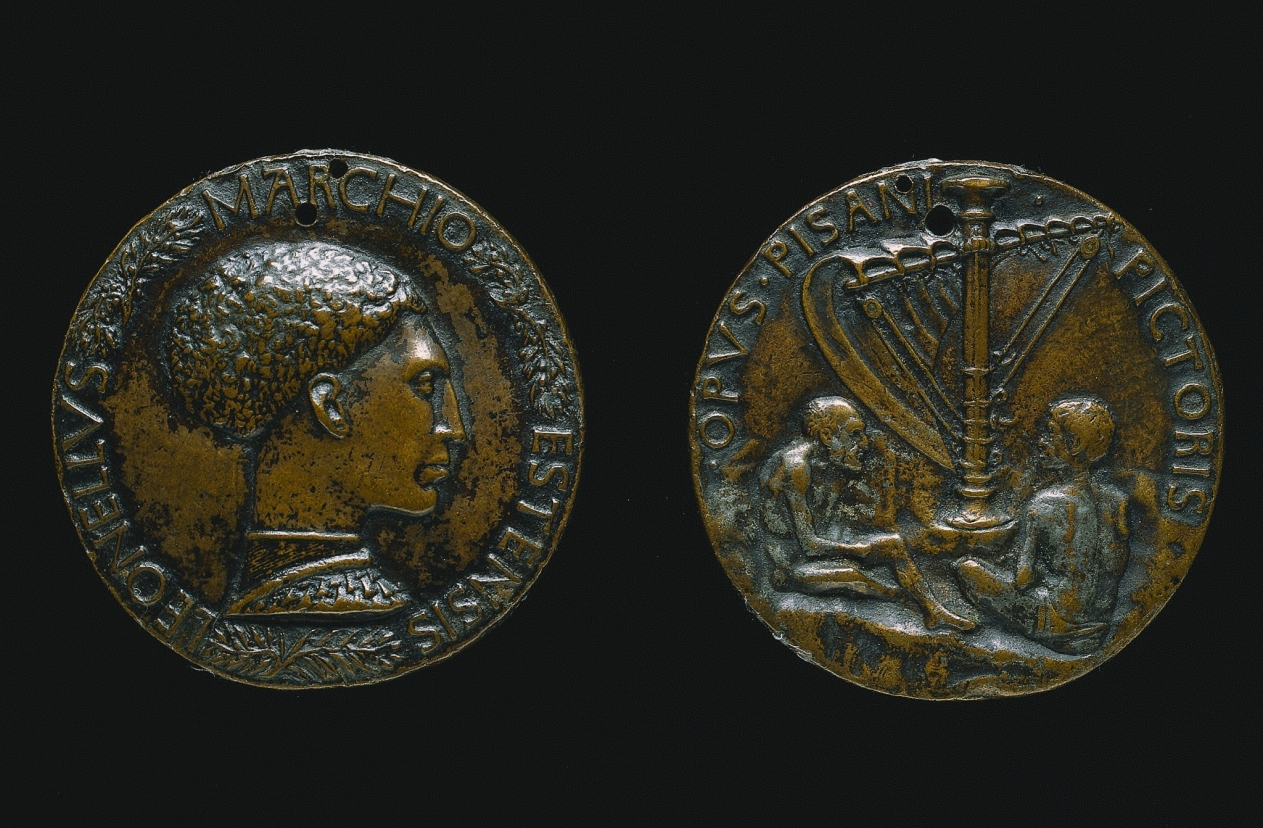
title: Portrait of Leonello D'Este, Marquess of Ferrara (obverse)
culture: Italy, 15th century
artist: Pisanello (Italian, Ferrara, c. 1395–1455)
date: c. 1440–1444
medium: bronze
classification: Sculpture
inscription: obverse: LEONELLVS MARCHIO ESTENSIS, separated by olive branches.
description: Renaissance medals usually show a person on the front and a symbolic element on the back, creating an overall statement about the individual. Lionello d'Este was one of the most sophisticated patrons in Renaissance Italy, and he was one of the first figures to sponsor the tradition of medals in the 1400s.